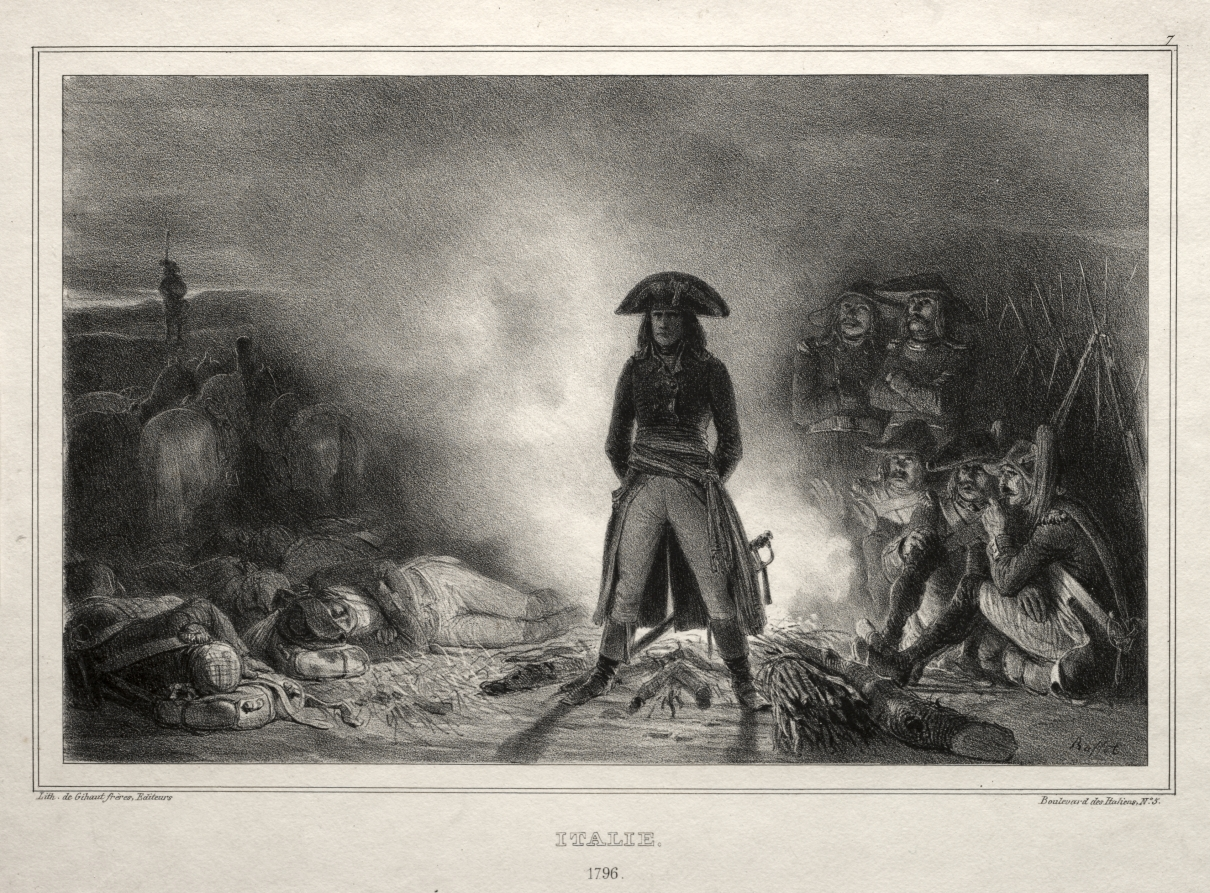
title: Album for 1836: Italy, 1796, Napoleon Bonaparte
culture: France, 19th century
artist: Auguste Raffet (French, 1804–1860)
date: 1836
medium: lithograph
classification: Print